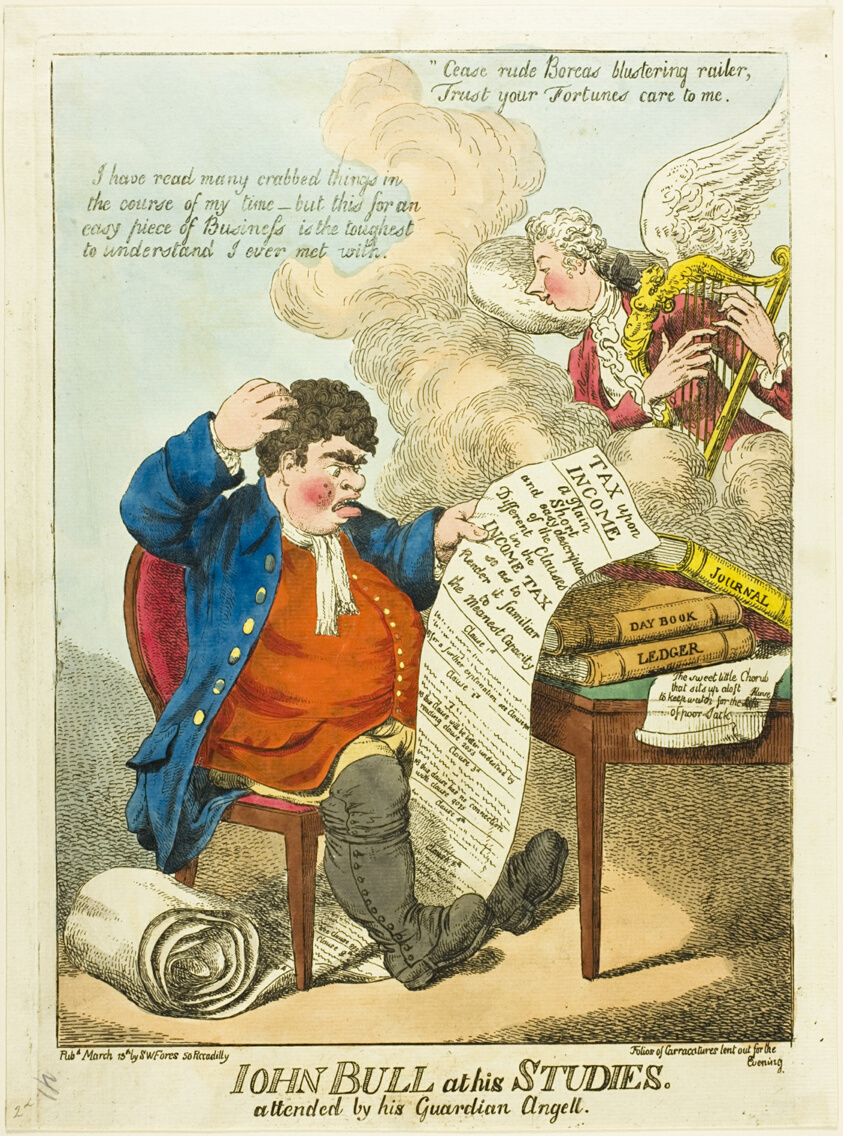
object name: Print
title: John Bull at His Studies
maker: Unknown Artist (English, late 18th-early 19th centuries); published by S. W. Fores (English, active 1785-1825)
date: published March 13, 1799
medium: Hand-colored etching on ivory laid paper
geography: England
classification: etching; print; prints and drawing